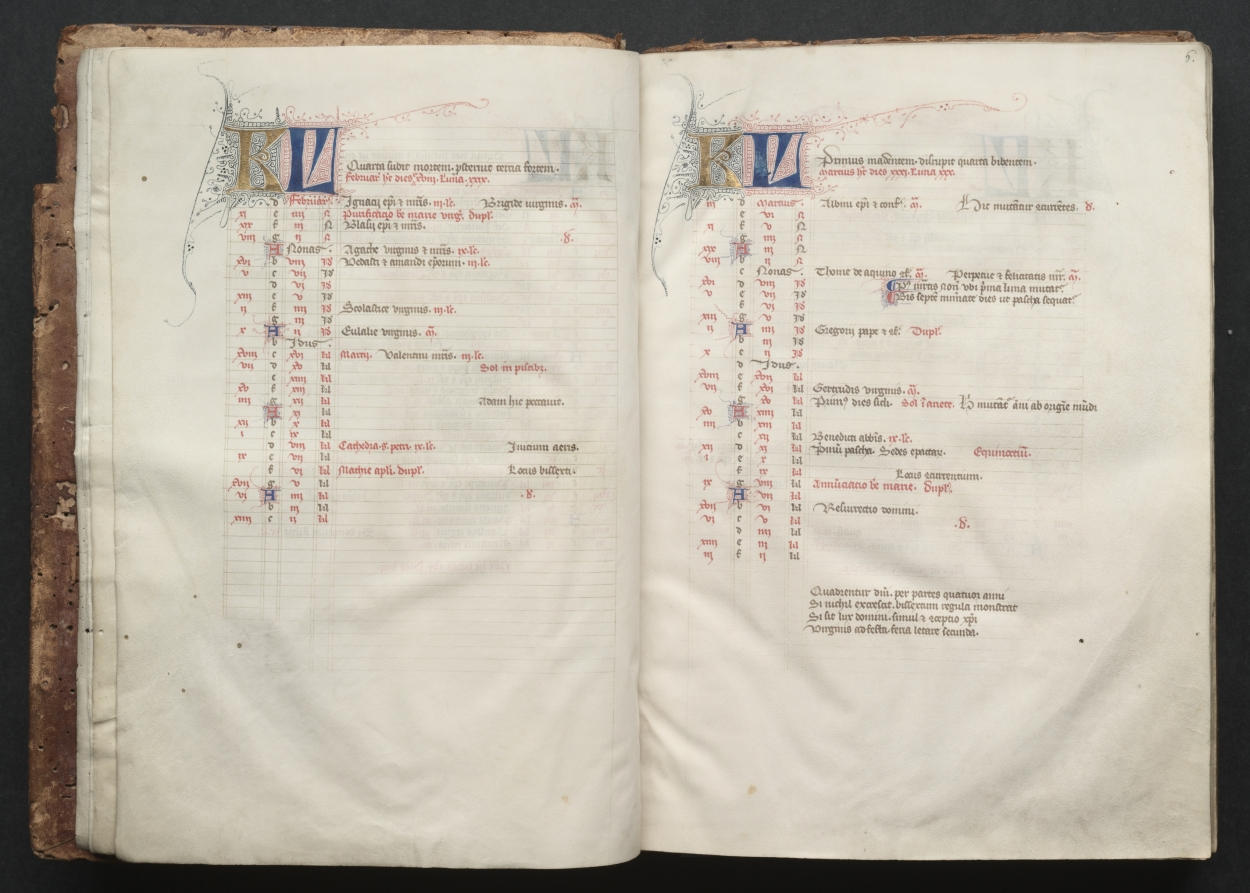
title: The Gotha Missal: Fol. 6r, Text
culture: France, Paris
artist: Master of the Boqueteaux (French)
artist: and Workshop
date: c. 1375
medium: ink, tempera, and gold on vellum; blind-tooled leather binding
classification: Bound Volume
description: The style and quality of this manuscript's decoration is typical of deluxe Parisian books made for aristocratic or royal patrons. Most of the book's decoration appears to be the work of the Master of the Boqueteaux, an artist active at the court of King Charles V (died 1380). His style was apparently shared by a number of book illuminators working in and around Paris. It is very possible that the Gotha Missal belonged to Charles V, but is not provable because the manuscript has no royal portraits and lacks a colophon. Given the book's magnificent decoration, however, it would seem that it was produced for a Valois prince, if not for the king himself. The manuscript receives its name from the German dukes of Gotha, its later owners.